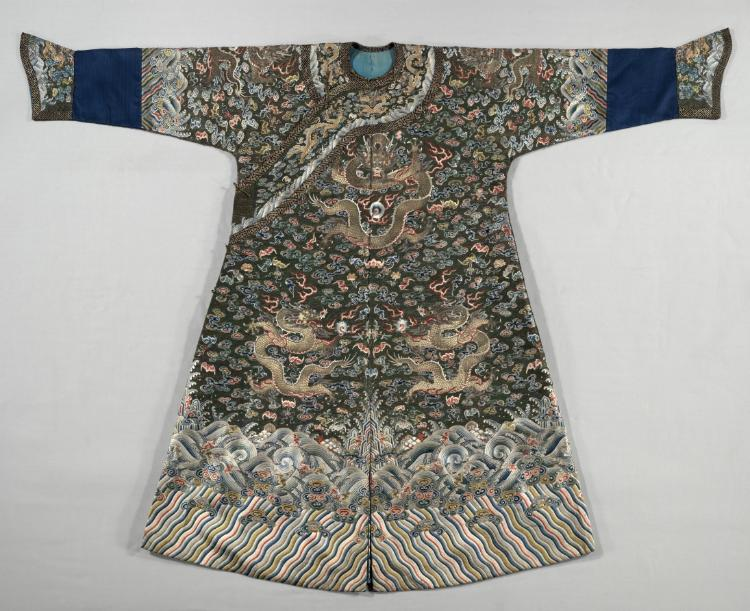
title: Imperial Robe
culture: China, Qing dynasty (1644-1911)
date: 1770s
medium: silk; embroidery with peacock tail feathers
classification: Garment